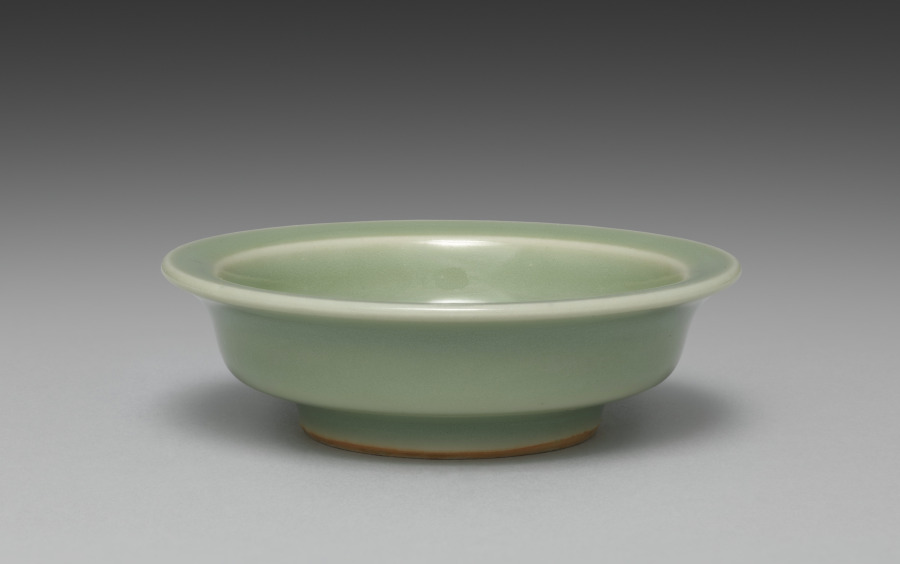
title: Saucer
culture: Japan, Meiji period (1868–1912)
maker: Seifū Yohei III (Japanese, 1851–1914)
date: 1893–1914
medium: One from a set of ten dishes; porcelain with green glaze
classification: Ceramic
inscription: 清風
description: Yohei III’s main output for his sophisticated clientele was in the form of tea sets and dining sets. He created a range of dishes in green glazes. He often produced in pairs, sets of five, or sets of ten. For this set of ten small dishes in a simple, round form that emphasizes the glaze above all, the box lid designates the piece as seiji, or green-glazed porcelain, using a general term for the extensive palette of green glazes often called celadon in English. The box lid further identifies the dishes themselves as tōchō, literally “bean-sized saucers,” a size that makes them suitable for dipping sauces.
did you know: The ten dishes in this set are stored in stacks of five in a two-compartment box.